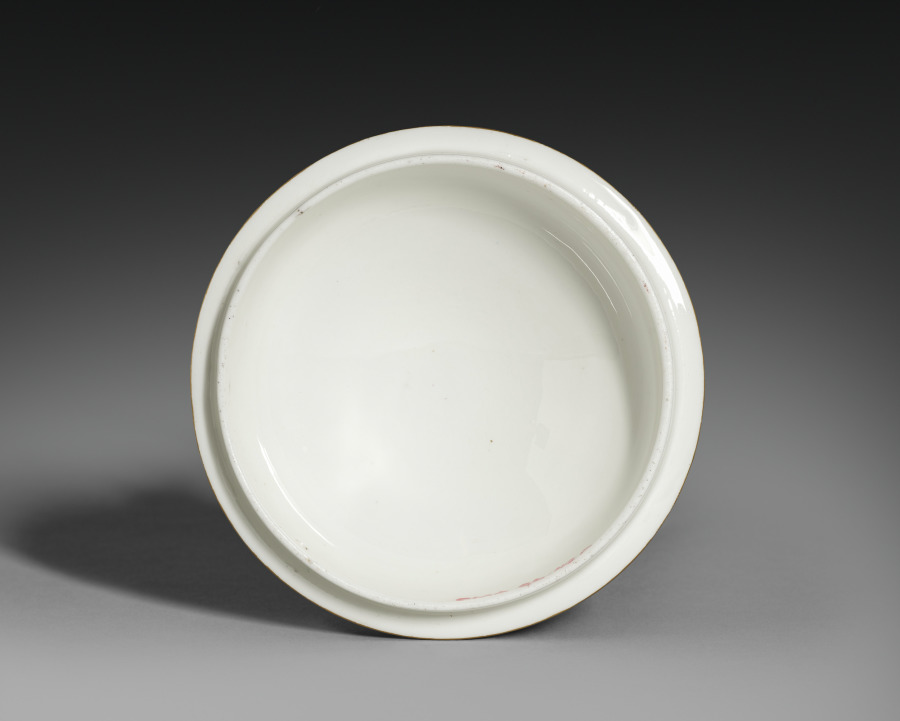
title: Cover for a Broth Bowl (Écuelle)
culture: France, Sèvres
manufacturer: Sèvres Porcelain Factory (French, est. 1756)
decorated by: François-Joseph Aloncle (French)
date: 1772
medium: soft-paste porcelain with enamel and gilt decoration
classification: Ceramic